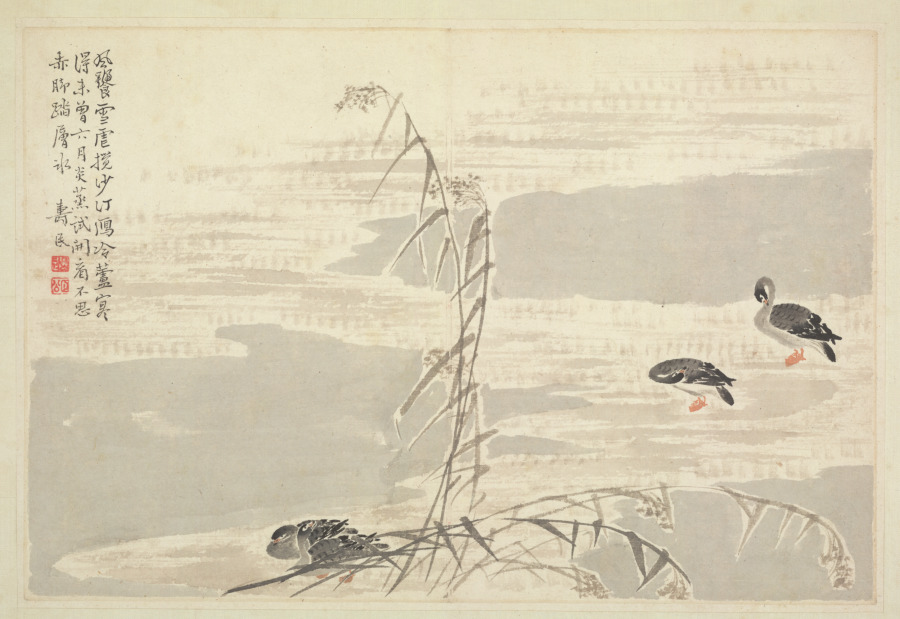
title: Album of Calligraphy and Paintings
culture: China, Qing dynasty (1644-1911)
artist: Bian Shoumin (Chinese, 1684–1752)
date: first half of the 1700s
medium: album leaf; ink and color on paper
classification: Painting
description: The artist Bian Shoumin is known for his depiction of wild geese, water, and reeds. The migrant birds in autumn and winter evoked, in the minds of the Chinese intelligentsia, a time of parting and sorrow.